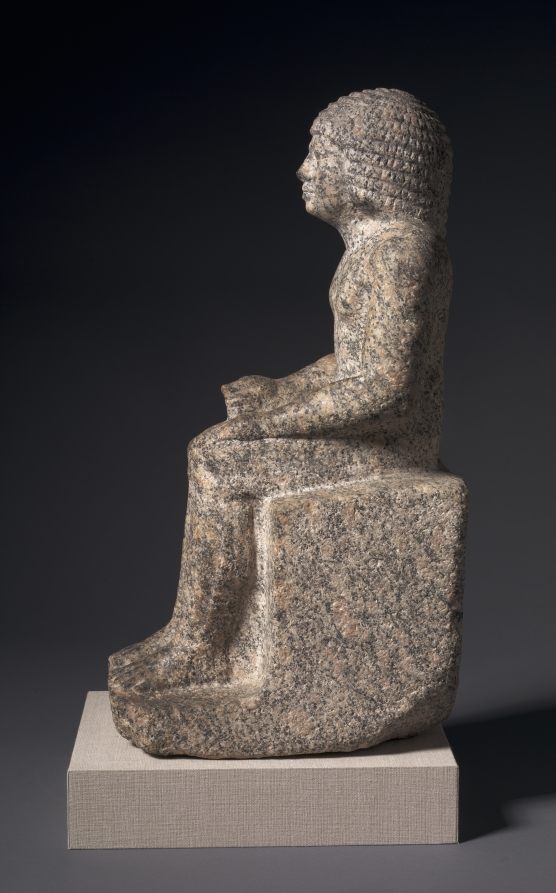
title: Seated Statue of Nykara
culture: Egypt, Old Kingdom (2647–2124 BCE), Dynasty 5, reign of Nyuserre (2445–2422 BCE) or later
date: 2408–2377 BCE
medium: red granite and pigment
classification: Sculpture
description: This statue inscribed on the base for the chief of the granary, Nykara, comes from the same tomb as the false door. A statue of granite was an expensive commodity. Monumental red granite was quarried at Aswan in the south of Egypt and had to be shipped more than five hundred miles downstream to Nykara's tomb in the area of Memphis.